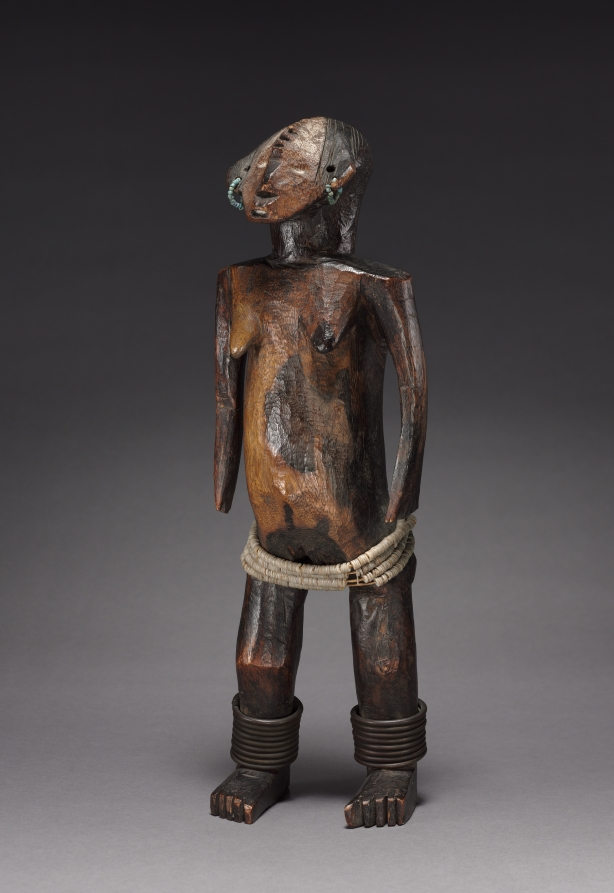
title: Female Figure of a Pair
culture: Africa, Central Africa, Democratic Republic of Congo, probably Ngbandi-style carver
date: late 1800s-early 1900s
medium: Wood, iron alloy, glass beads, plant fiber, and cloth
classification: Sculpture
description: Carving of paired figures is quite well documented among the Ngbandi and its neighbors the Ngbaka-Minagende, where such sculptures are said to represent the mythical ancestor Seto and his sister-wife, Nabo. Field-based research cannot confirm the existence of figurative couples among the Ngbandi.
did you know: Odette Delenne, the collector of this pair, said that these figures reminded her of herself and her husband, René.